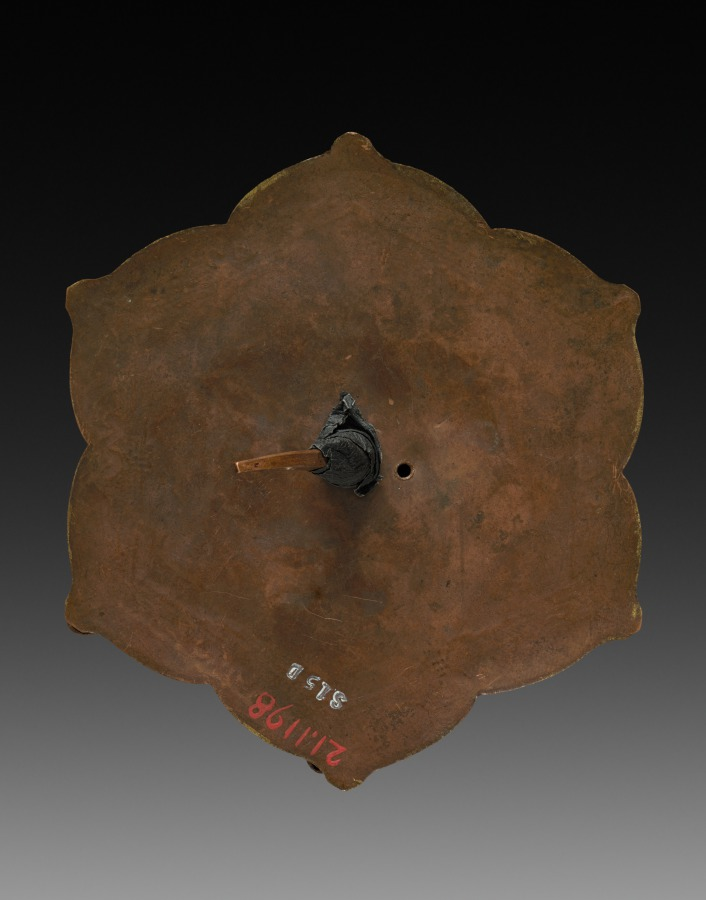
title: Gilt Nail Head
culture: Japan, Edo period (1615–1868)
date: early to mid-1800s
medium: gilt bronze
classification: Metalwork